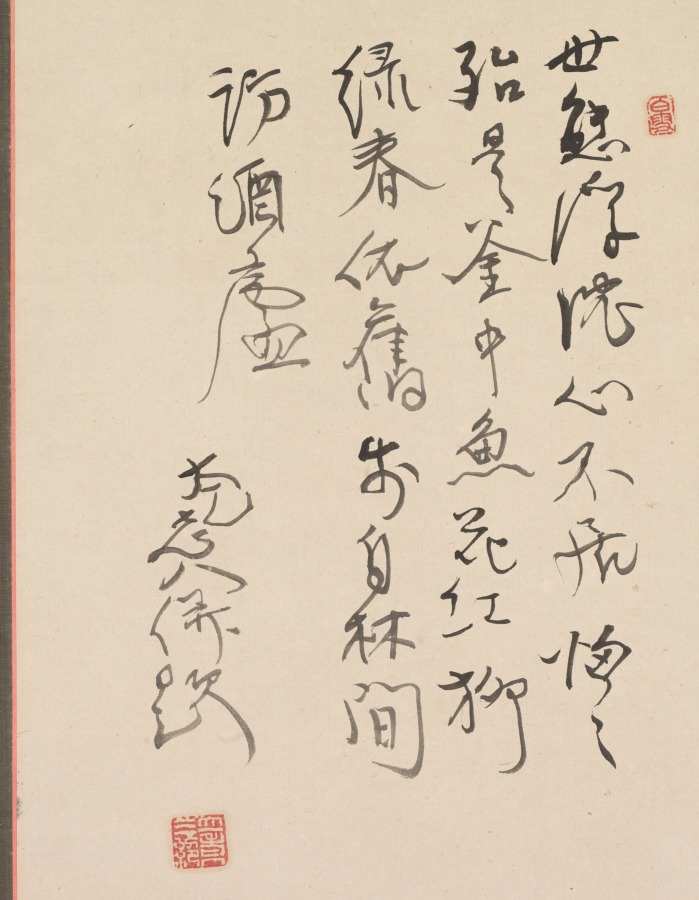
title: Casually Created on a Spring Day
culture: Japan, Edo period (1615–1868) to Meiji period (1868–1912)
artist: Murase Taiitsu (Japanese, 1803–1881)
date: c. 1825–81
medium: hanging scroll; ink on paper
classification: Painting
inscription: artist's inscription, signature, and seal at top of painting.